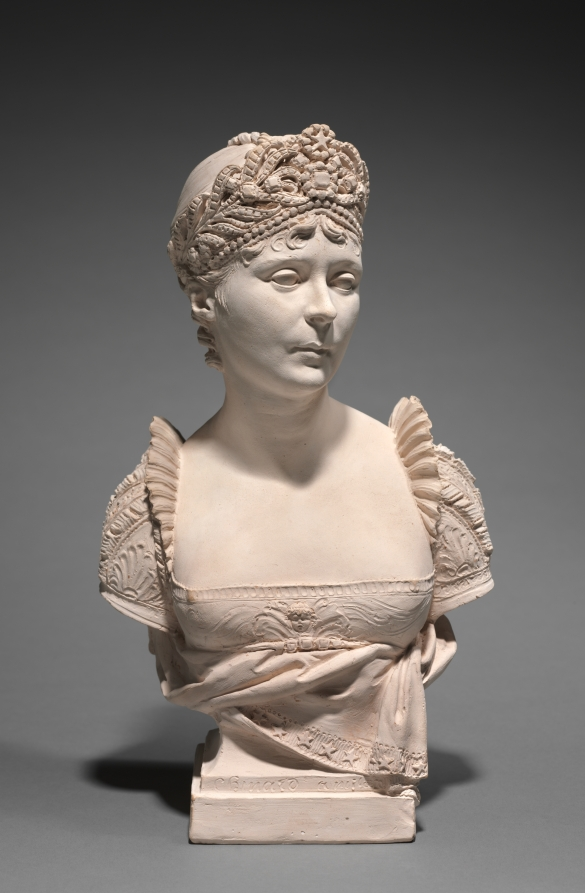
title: Bust of Empress Josephine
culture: France, 19th century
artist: Joseph Chinard (French, 1756–1825)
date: 1805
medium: terracotta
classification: Sculpture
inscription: inscribed on front of base in ligature: "chinard a milan"; inscribed on back of base in ligature: "chinard/de/l'institut m(al?)/membre de plusiere [sp]/ academies/milan-an l (3?)"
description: This bust of the Empress Josephine was sculpted in Milan in 1805 when she accompanied Napoleon to that city for his coronation as the King of Italy.